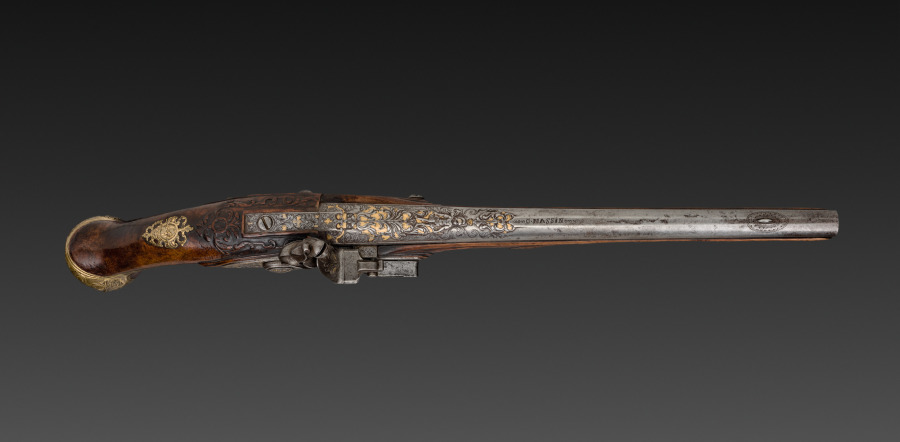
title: Flintlock Pistol (2 of 2)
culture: Franco-Flemish, Liège, early 18th Century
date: early 1700s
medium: steel with gold inlay, gilt-brass mounts; walnut burl stock; chiseled high-relief decoration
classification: Arms and Armor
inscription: on barrel: G. MASSIN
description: The barrel of this pistol is signed G. MASSIN, a gunsmith apparently working in eastern France or French-speaking Flanders, possibly the city of Liège. The exquisite ornament along the breech of the barrel is chiseled and engraved. The gilded lock-plate and mounts may be compared to the finest contemporary work in other media, such as furniture with ormolu mounts.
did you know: The flintlock ignition system was developed in the 1600s and remained the dominant system until the early 1800s.